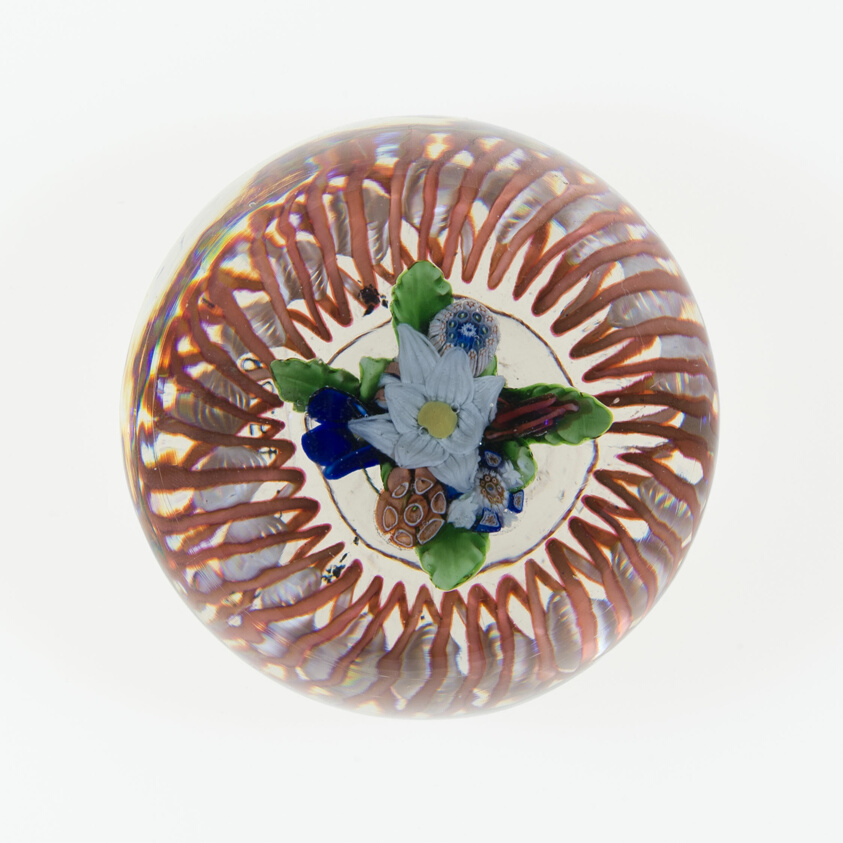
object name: Glass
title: Paperweight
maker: Saint-Louis Glassworks (Cristalleries de Saint-Louis); Lorraine, France, founded 1586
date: c. 1845–60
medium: Glass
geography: Saint-Louis-lès-Bitche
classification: paperweight; glass